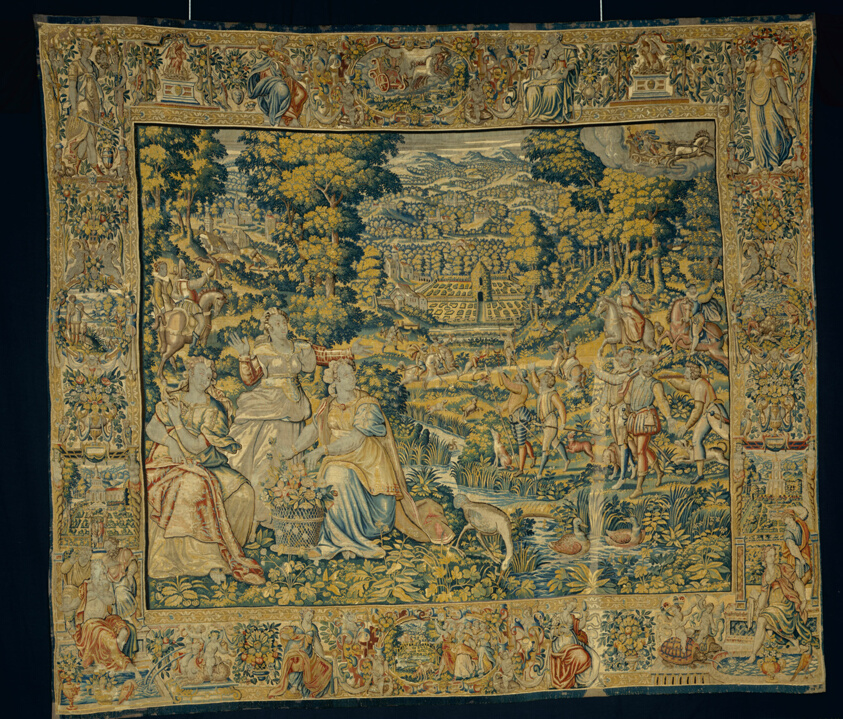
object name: Textile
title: Pluto and Proserpina with Falconry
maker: After an engraving by Adriaen Collaert (c. 1560–1618) after Hans Bol (1534–1593), Falconry; Woven at the workshop of Erasmus I de Pannemaker (c. 1565–1620 or later); Flanders, Brussels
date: c. 1600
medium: Wool and silk, slit and double interlocking tapestry weave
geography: Flanders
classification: weaving - tapestry; textile